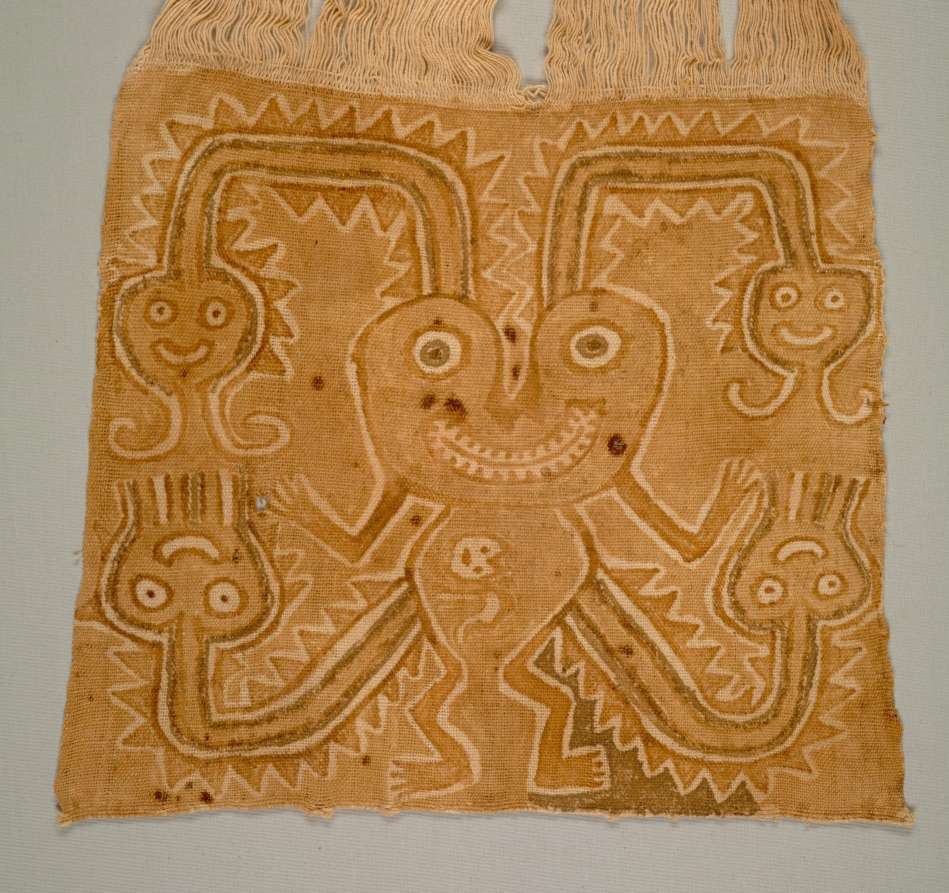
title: Mummy Bundle "Mask"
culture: Peru, South Coast, Ica Valley, Ocucaje site, Paracas style (700 BCE–1 CE)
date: 400–200 BCE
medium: cotton and pigment, plain weave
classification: Textile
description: The Paracas people buried their dead in bundles that they created by carefully wrapping the seated human body in layers of garments and other textiles. In some cases, they placed a painted cloth—such as these examples—on the outer layer and at the top of the bundle. The hair-like yarns (unwoven warps) were arranged around a solid cotton disk that was sometimes wrapped with a headband. The cloths, then, seem to have functioned as the bundle’s head, even though some are painted not with faces but with complete figures whose supernatural character is marked by the appendages streaming from their bodies.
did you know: These masks fall into two categories, those with only a face and those with a full-bodied figure.